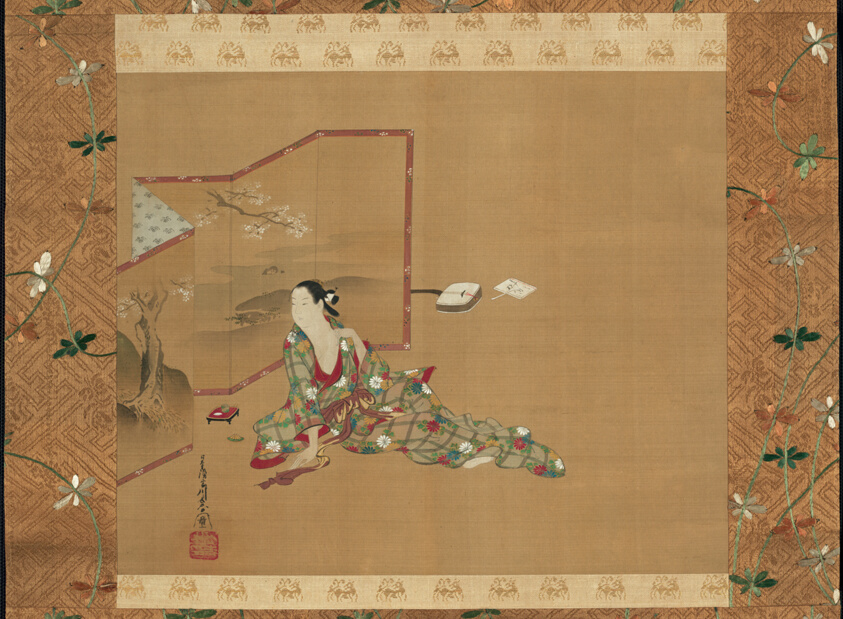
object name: Painting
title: A Beauty Behind a Screen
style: Japanese (culture or style)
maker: Miyagawa Chôshun (Japanese, 1683-1753)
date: About 1750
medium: Hanging scroll; ink and colors on silk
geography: Japan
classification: hanging scroll; painting; asian art